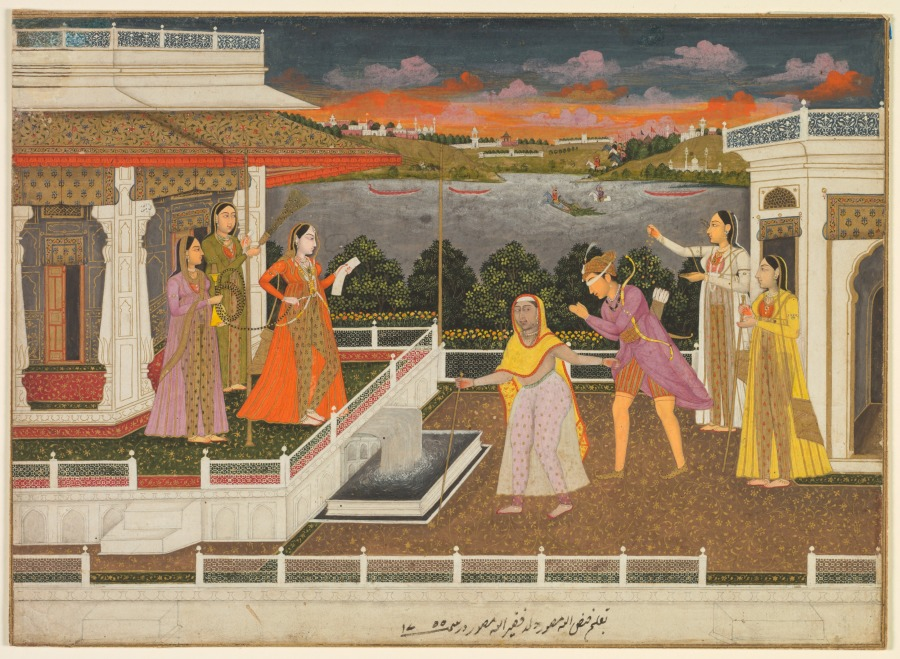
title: A blindfolded suitor is brought before a princess; verso: scrolling floral vines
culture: India, Lucknow, Mughal, 18th century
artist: Fayzullah (Indian, active c. 1730–1765)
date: 1755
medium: Gum tempera and gold on paper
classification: Painting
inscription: signed in two places: on capital of central pillar: 'amal - i Fayzullah ("the workof Fayzullah"), and below: bi - qalam i Fayzullah Musavvir walad - i Faqirullah Musavvir dar sanna 1755 ("by the pen of Fayazullah the painter son of Faqirullah the painter in the the year 1755")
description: In a scene set on a carpeted terrace in the women’s palace quarters, an older woman of the harem drags a young prince with a white blindfold over his eyes before a princess grasping a document. Such a scene evokes a literary allusion of a princess who selects her suitor, but it also resonates with circumstances at the Mughal court. Signed and dated by the artist, this painting was completed at a time when powerful women wielded control over the emperor, and Ahmad Shah Bahadur (reigned 1748–54), son and successor of Muhammad Shah, had been blinded and deposed less than one year before.